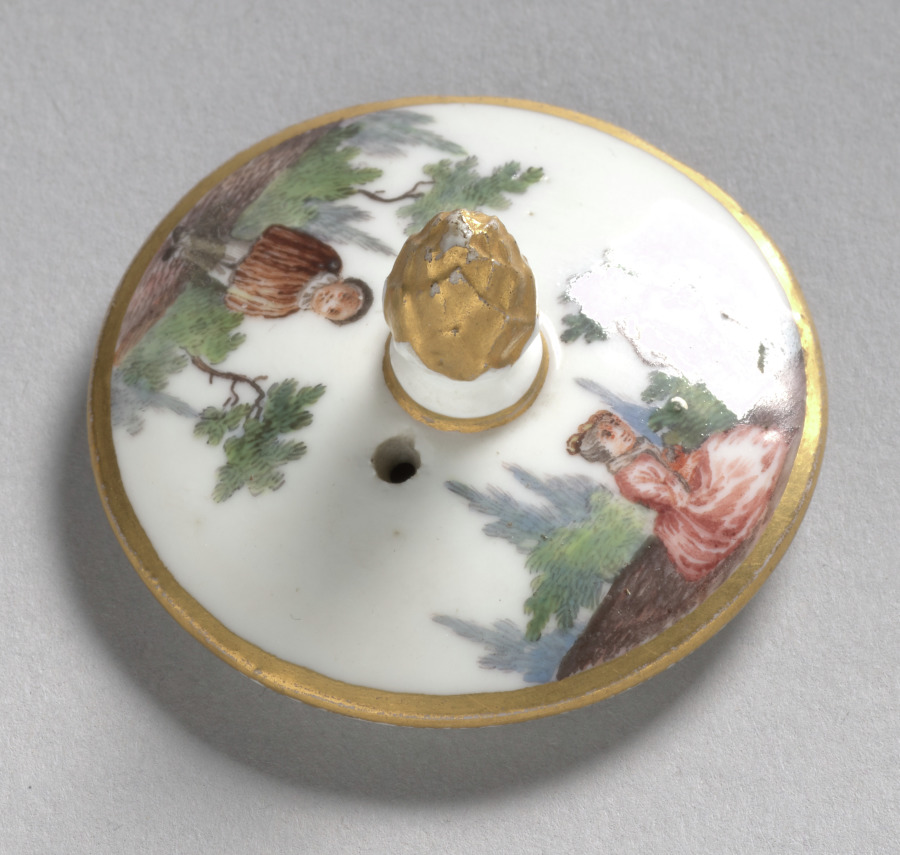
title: Lid for a Teapot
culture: Germany, Meissen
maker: Meissen Porcelain Factory (German, est. c. 1710)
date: c. 1750–70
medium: porcelain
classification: Ceramic